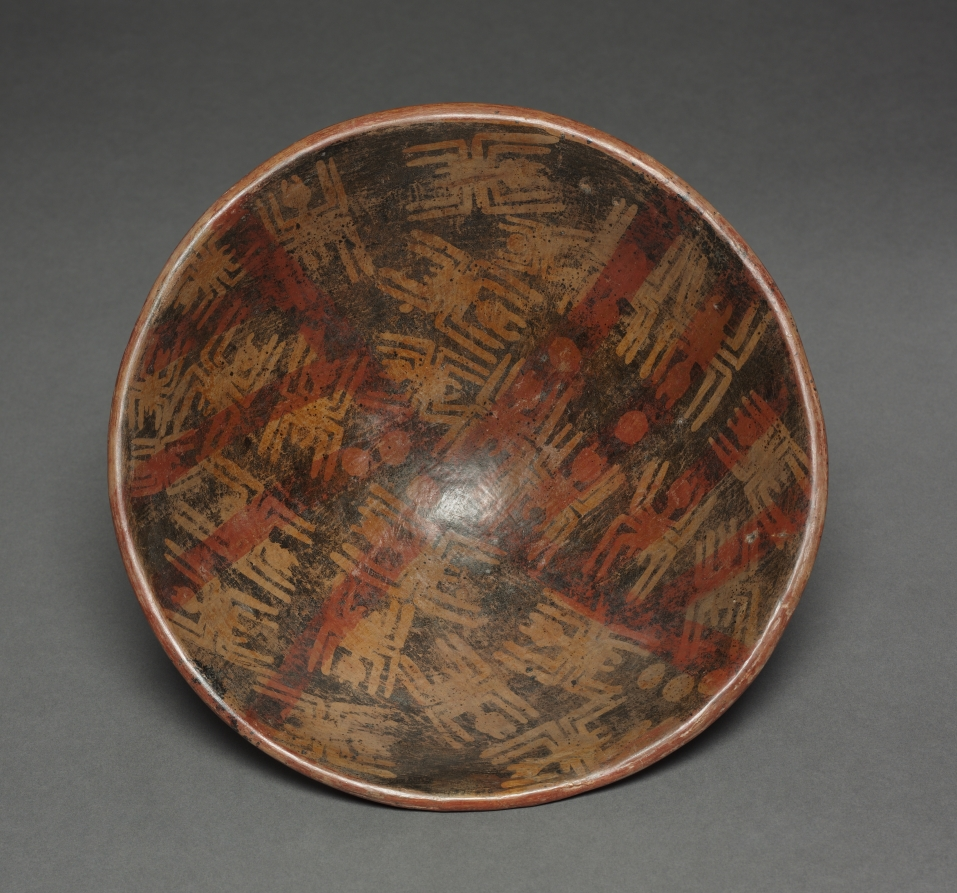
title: Bowl with Spider Decoration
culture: Colombia, Highland Nariño region, Piartal style, 8th-13th Century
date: c. 750–1250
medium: ceramic, slip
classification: Ceramic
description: In the Nariño region of southwestern Colombia, the dead were buried in shaft tombs, the most elaborate up to sixty feet deep and furnished with offerings such as these bowls. Colombian ceramics are not much studied and little can be said about their imagery, which reveals a keen interest in geometric abstraction. Depicted here are a row of figures with thatch-roofed huts, humans attacked by birds, and spiders.